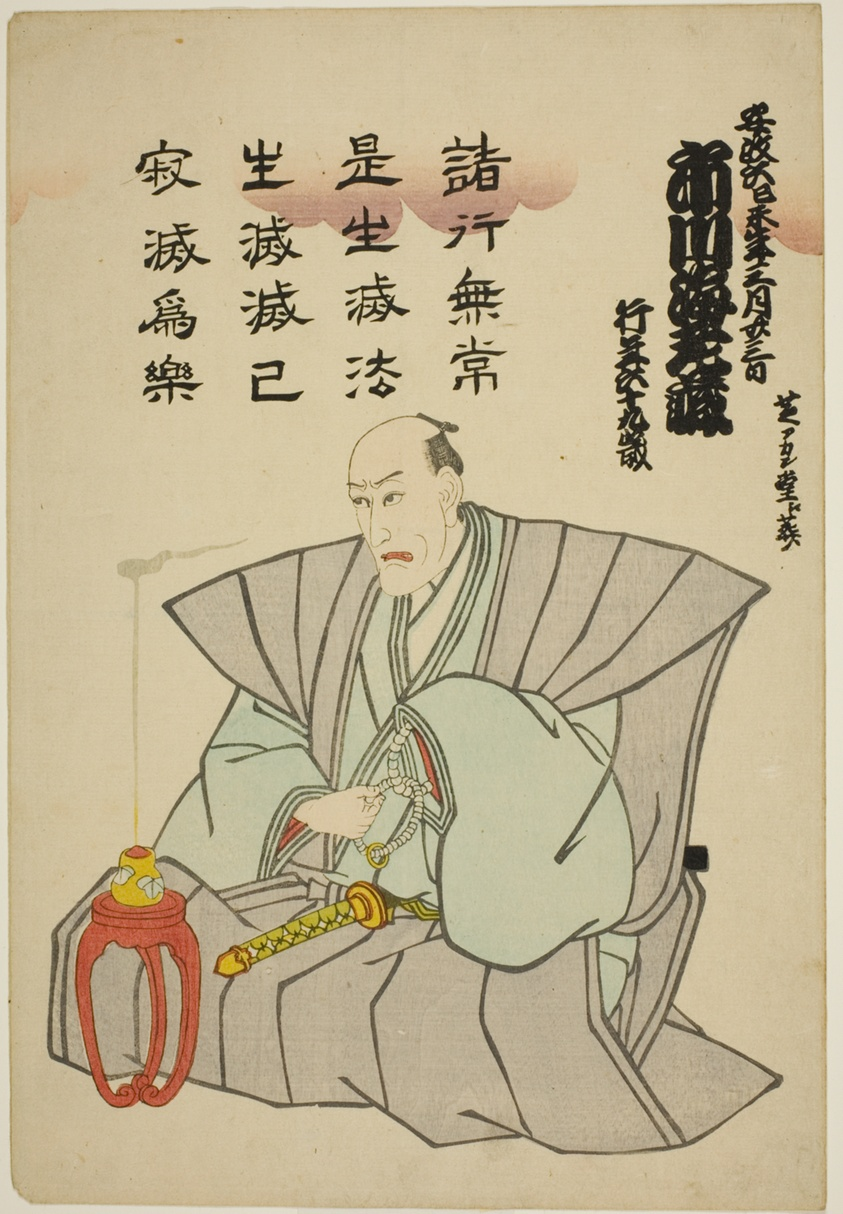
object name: Print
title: Memorial Portrait of the Actor Ichikawa Ebizo V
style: Japanese (culture or style)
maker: Utagawa Kunisada I (Toyokuni III) (Japanese, 1786–1864)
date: 1859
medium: Color woodblock print; oban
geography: Japan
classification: print; asian art